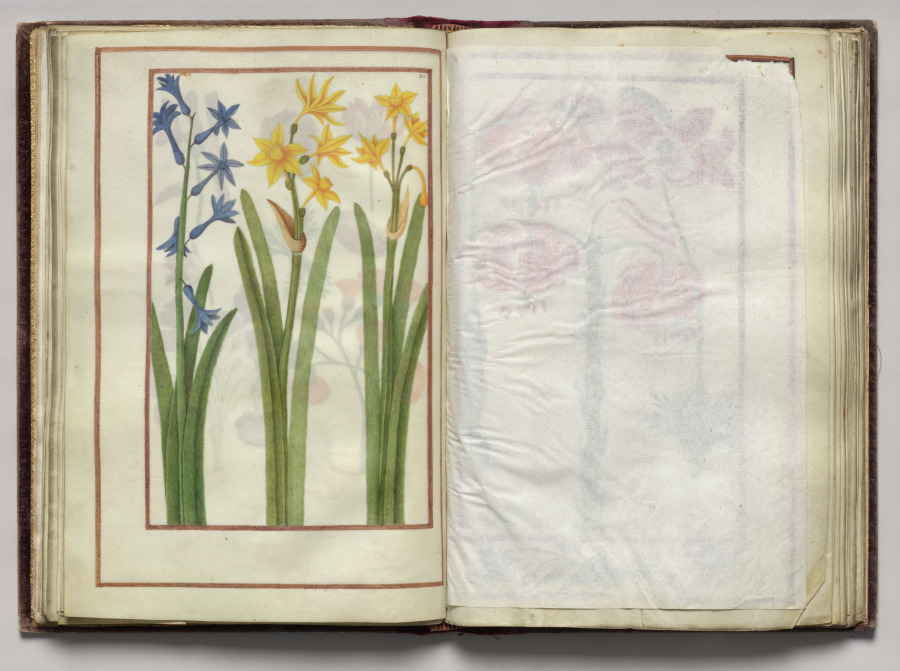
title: Florilegium (A Book of Flower Studies)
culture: France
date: 1608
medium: bound manuscript of 48 leaves, 77 drawings; watercolor, ink, silver, and gold over occasional traces of pencil, on vellum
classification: Bound Volume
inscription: Dated: Poitiers 1608 (on frontispiece) Signed: On frontispiece in black ink, lower right: Van Kuyk Notation on drawing: Frontispiece: in pencil, lower margin: * élève de Van Kessel, peintre flammand (* in pencil also appears in front of Van Kuyk's name).